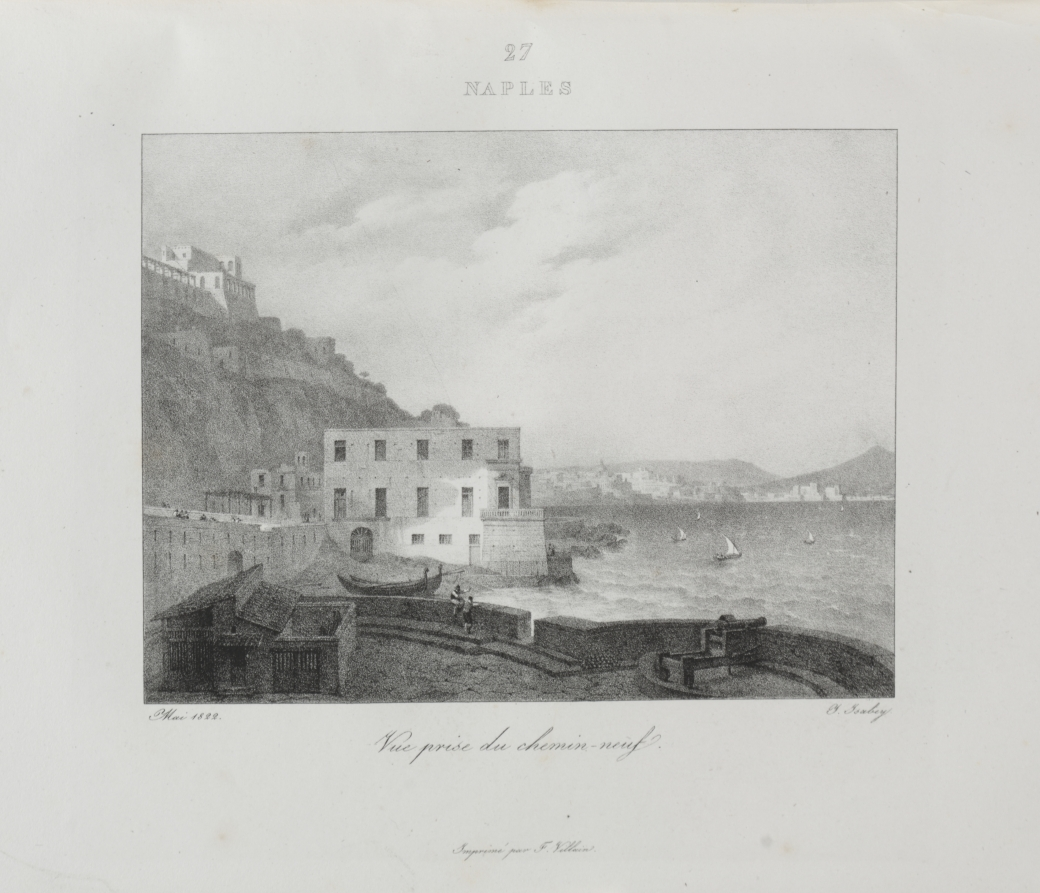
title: Voyage en Italie en 1822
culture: France, 19th century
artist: Jean-Baptiste Isabey (French, 1767–1855)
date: 1833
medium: lithograph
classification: Bound Volume